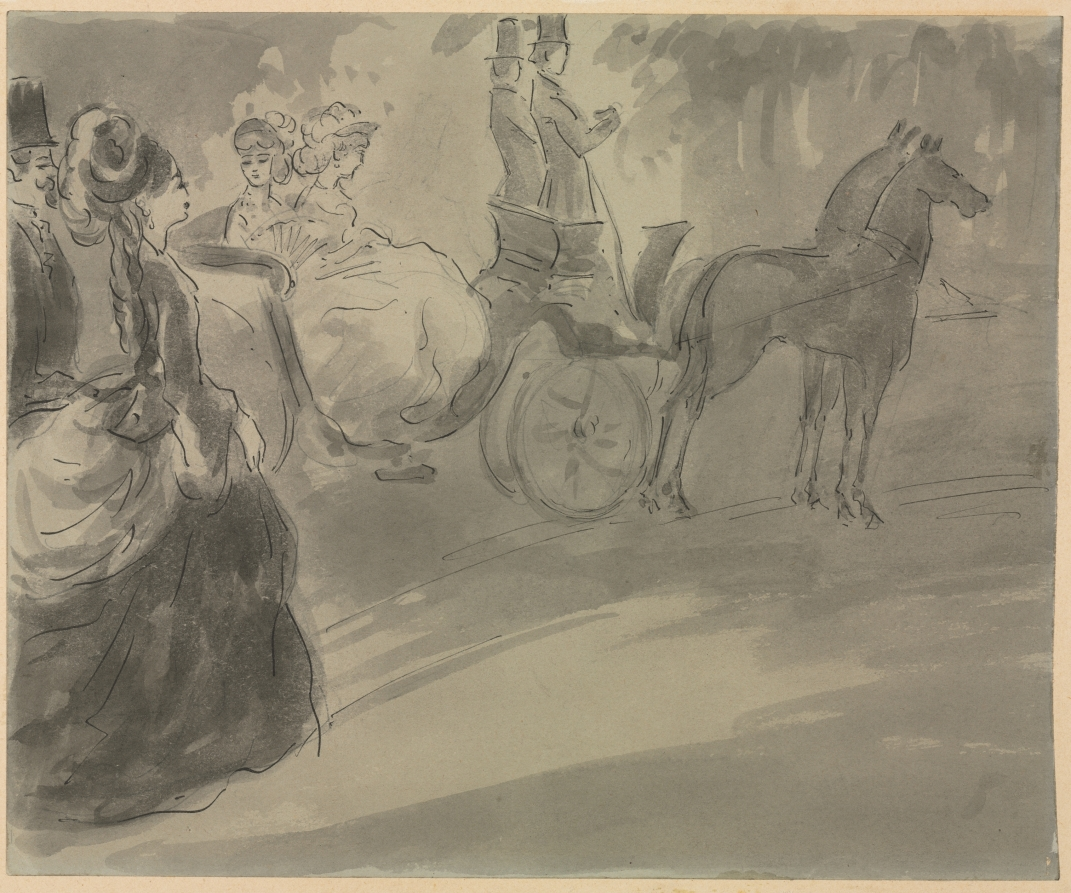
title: A Stop in the Park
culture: France, 19th century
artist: Constantin Guys (French, 1805–1892)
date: 1800s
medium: pen and black ink and brush and gray wash over graphite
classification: Drawing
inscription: VERSO OF SECONDARY SUPPORT, across top, in graphite: Un Instant d'arret au bois ; "les Bourgeois!" / Constantin Guys. From the John Quinn Colln ; center, in graphite: [30 x 35 ?] [crossed out and underlined] / [33-39 ?]